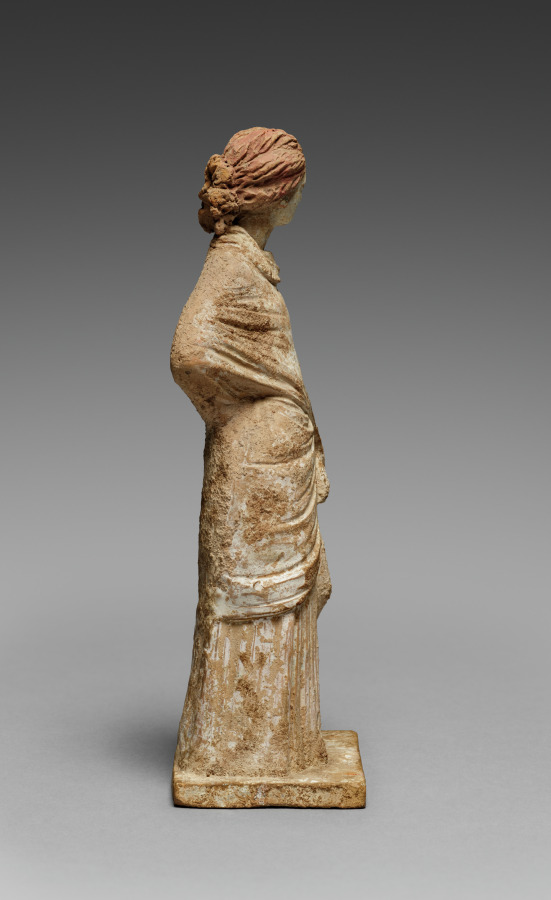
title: Female Figurine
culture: Greece, Tanagra (Boeotia)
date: 330–200 BCE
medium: molded terracotta, painted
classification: Sculpture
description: This figurine depicts an elegantly draped young woman wearing a cloak or himation over a dress called a chiton. The contrast between her sharp elbow and flowing skirts illustrates an interest in the stretch and fold of different fabrics. Originally brilliantly painted, this figurine still has traces of color such as the red hair and the white on her face. The site of Tanagra in central Greece is known for its abundance of terracotta figurines like this one made by mixing and matching different molds.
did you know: This woman’s rolled hairstyle is now called a “melon coiffure.”